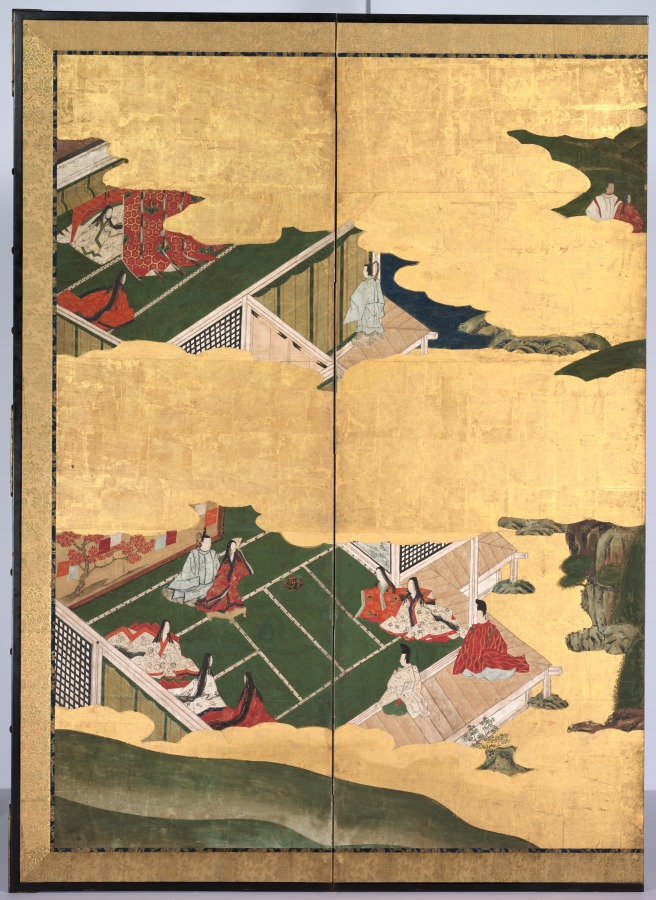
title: Scenes from the Tale of Genji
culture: Japan, Edo period (1615–1868)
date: late 1700s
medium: One of a pair of six-panel folding screens; ink and color on gilded paper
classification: Painting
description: Folding screens served as temporary dividers in traditional Japanese open-plan architectural spaces. This pair was inspired by Japan’s most celebrated work of literature, the Tale of Genji, written by Murasaki Shikibu, an attendant to the empress in the early 11th-century imperial court. The novel follows the love life of the “Shining Prince” Genji and delves into the psychological states of his many companions. Distinct episodes are nestled within a matrix of golden clouds and landscape elements. Each screen includes six episodes presented in a nonlinear fashion, capturing scattered highlights of the story.